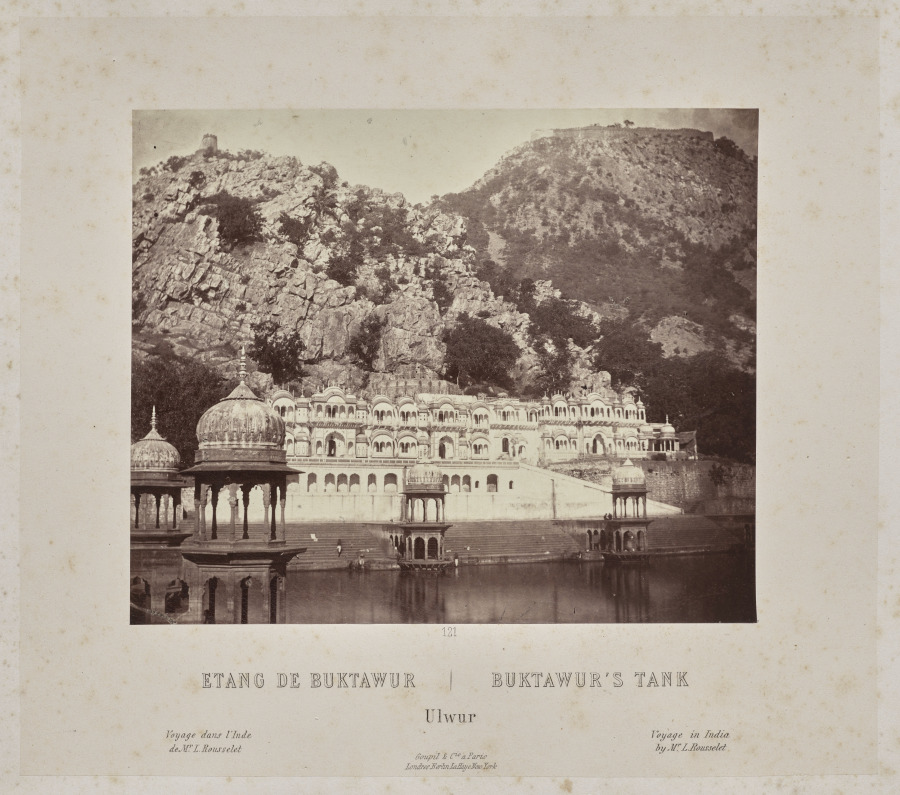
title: Buktawur's Tank, Ulwur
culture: France, 19th century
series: India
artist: Louis-Théophile Marie Rousselet (French, 1845–1929)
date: 1865–68, published 1869–70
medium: Albumen print from glass plate negative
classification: Photograph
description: Concerned that his drawings did not do justice to the splendor of India’s monuments, Rousselet learned photography in India that year, a remarkable accomplishment. He proved to be a talented photographer with a sophisticated sense of composition. The scenes in this volume sweep across sites of Sultanate, Rajput, and Mughal power in northern India, from the sacred Hindu city of Varanasi on the Ganges River to Alwar in Rajasthan. Also included are several scenes of industry and portraits of Indian rulers.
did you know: Louis Rousselet described himself as a “scientific traveler” when he went to India alone at age 18 in 1863 and stayed into 1868.